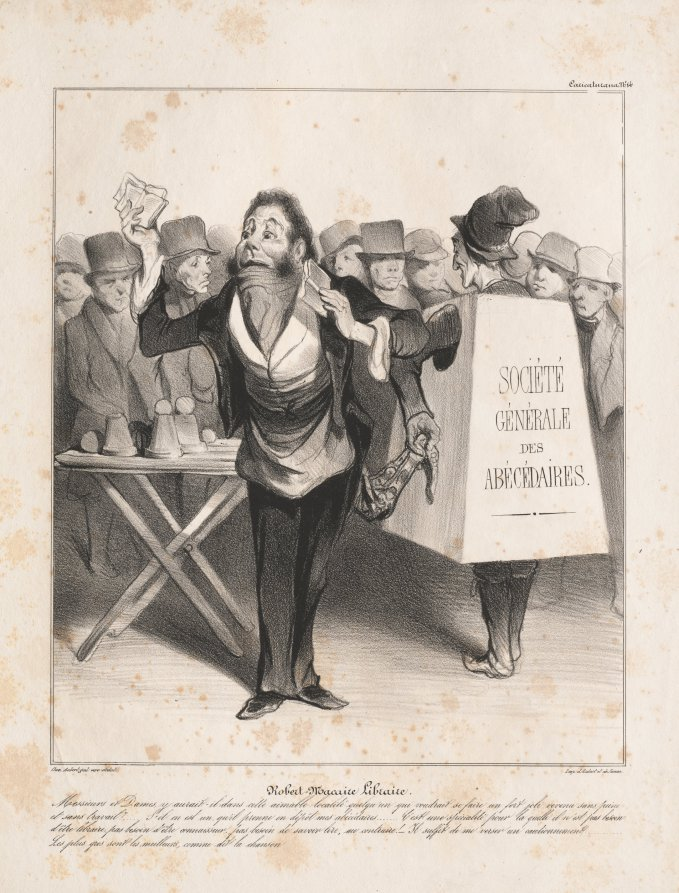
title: Robert Macaire Bookseller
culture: France, 19th century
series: Caricaturana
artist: Honoré Daumier (French, 1808–1879)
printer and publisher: Aubert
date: 1836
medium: lithograph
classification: Print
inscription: Above image, printed: Caricaturana. No. 14 ; Below image, printed: Robert-Macaire Libraire. / Messieurs et Dames y aurait-il dans cette aimable localité quelqu'un qui voudrait se faire un fort joli revenu sans peine / et sans travail?...... S'il en est un, qu'il prenne en dépôt mes abécédaires....... Cést une spécialité pour la quelle il n'est pas besoin / d'être libraire, pas besoin d'être connaisseurs, pas besoin de savoir lire, au contraire! _Il suffit de me verser un cauttionnement........ / Les plus gros sont les meilleurs, comme dit la chanson.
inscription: Lower margin, printed: Chez Aubert, gal: vero-dodat. / Imp. d'Aubert et de Junca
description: This print was published in Le Charivari (November 26, 1836) as plate 14 from the series Caricaturana.